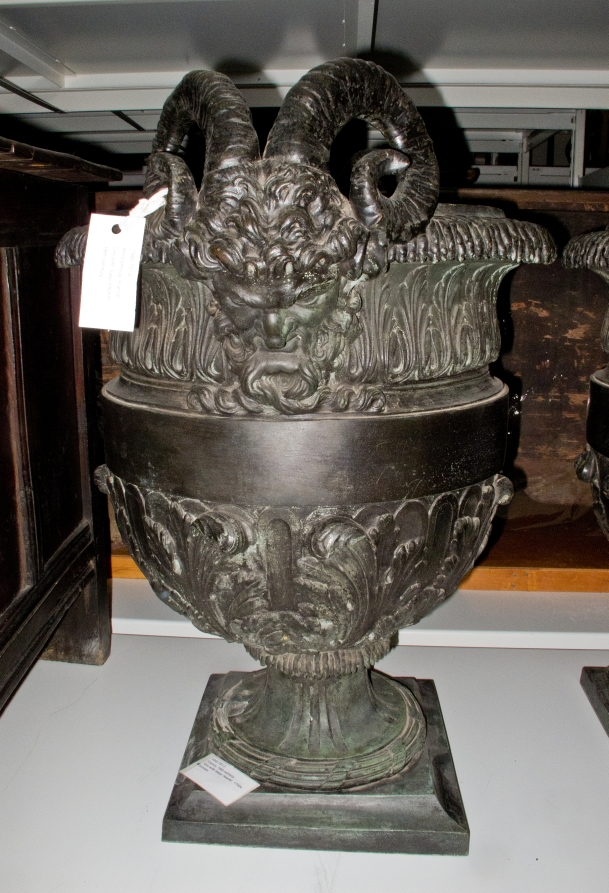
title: Urn with Satyr Heads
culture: France, 18th century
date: 1700s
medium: bronze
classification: Metalwork